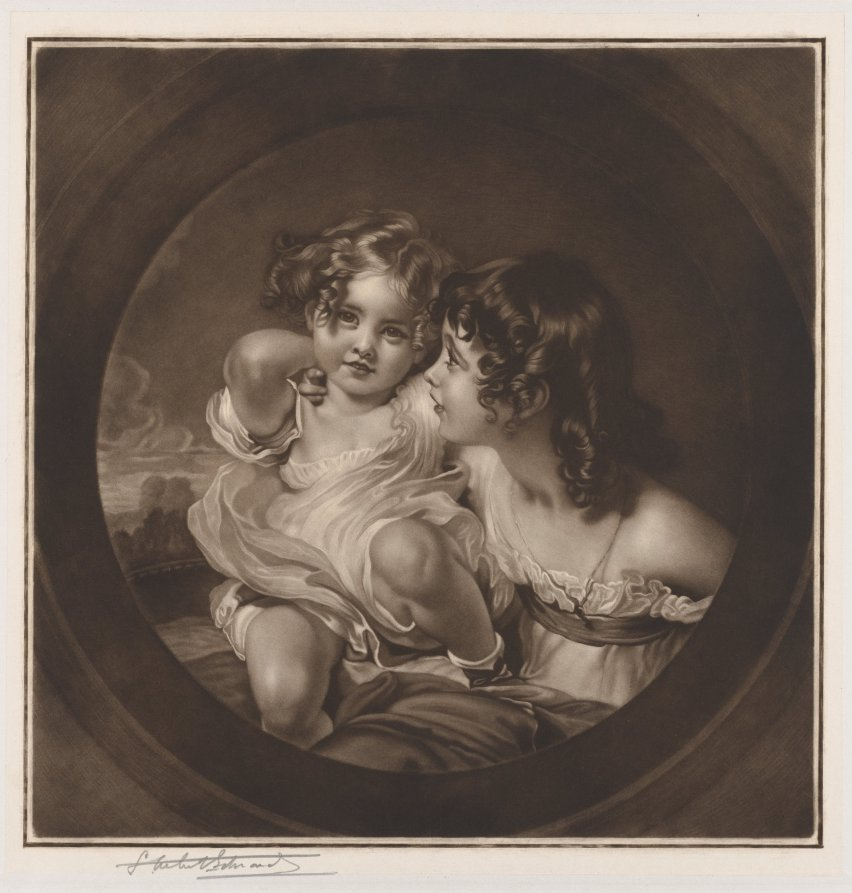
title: Nature (Calmady Children)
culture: America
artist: Samuel Arlent-Edwards (American, 1862–1938)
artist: after Thomas Lawrence (British, 1769–1830)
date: c. 1880–1923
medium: mezzotint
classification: Print